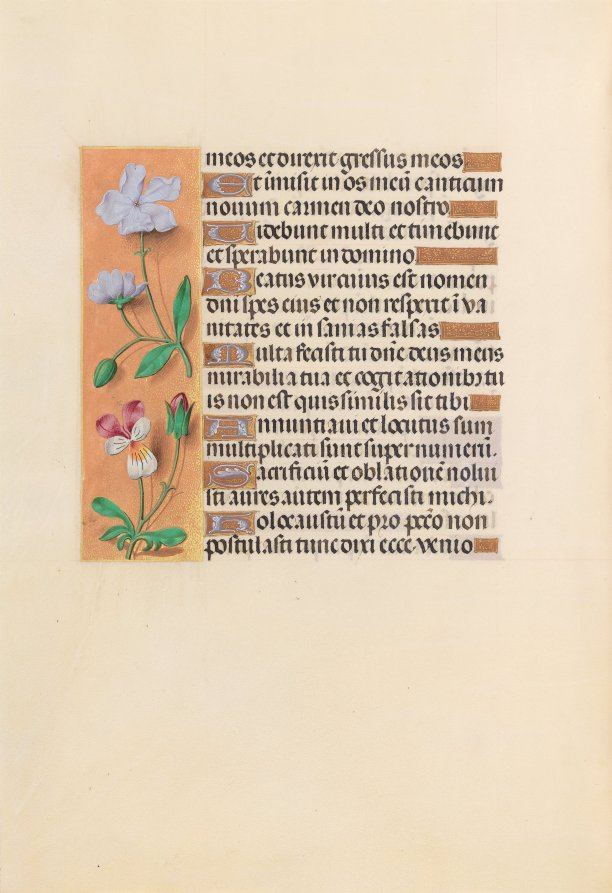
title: Hours of Queen Isabella the Catholic, Queen of Spain: Fol. 239v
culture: Flanders, Ghent and Bruges, late 15th century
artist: Master of the First Prayerbook of Maximillian (Flemish, c. 1444–1519)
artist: and Associates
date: c. 1500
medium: ink, tempera, and gold on vellum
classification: Bound Volume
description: This manuscript was illuminated by a circle of at least five highly organized manuscript painters active in the Flemish cities of Ghent and Bruges. The principal illuminator was Alexander Bening, who painted the majority of the book's miniatures. Manuscripts produced by this circle of artists are renowned for the decoration of their borders, which typically feature a rich variety of realistically-painted flowers, birds, and butterflies. This prayer book, called a book of hours, was intended not for a cleric, but for the private devotions of a lay person-in this case, Isabella the Catholic, Queen of Spain (1451-1504). Isabella's coat of arms embellishes the book's frontispiece. It is unlikely that the book was commissioned by the Queen herself; rather, she probably received it as a diplomatic gift from someone courting her patronage, perhaps Cardinal Francisco Jimenez de Cisneros. A Franciscan friar, Jimenez was dependent upon Isabella for his advancement, first to the post of Queen's confessor in 1492, and then to Archbishop of Toledo in 1495.